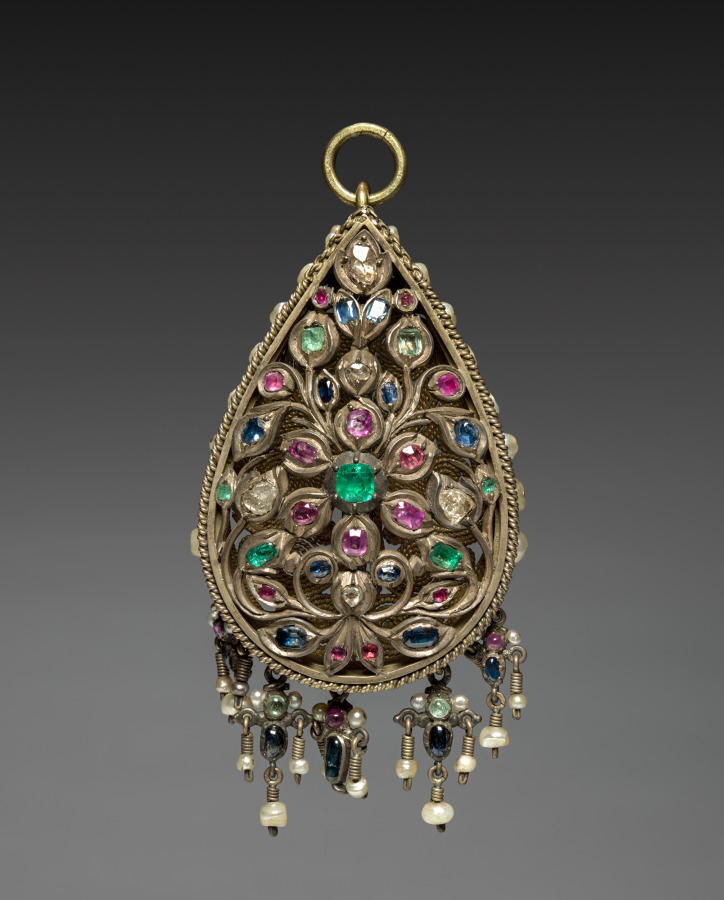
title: Pendant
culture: Balkans, 19th century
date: 1800s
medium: silver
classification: Jewelry